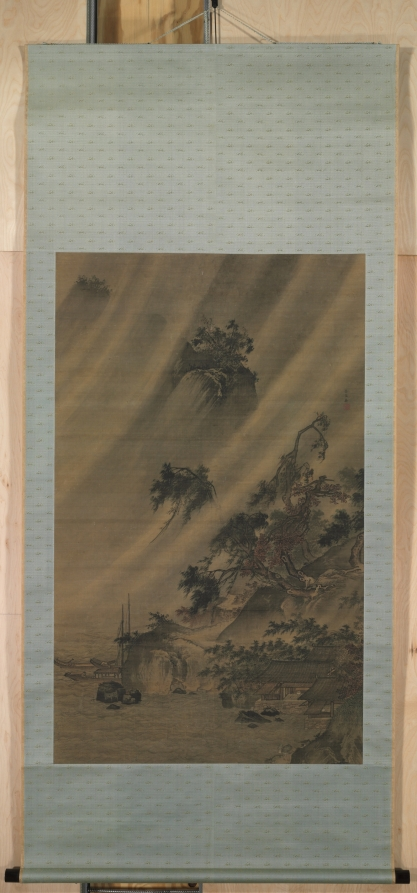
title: River Village in a Rainstorm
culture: China, Ming dynasty (1368–1644)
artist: Lu Wenying (Chinese)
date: c. 1480–1507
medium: Hanging scroll; ink and slight color on silk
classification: Painting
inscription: 呂文英 [印] 日近清光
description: In this scene, windswept rain pelting a village captures the power of nature in a masterful composition. Lü Wenying from Zhejiang served as a court painter during the Hongzhi era (1488–1505). Hardly known, with few remaining works, he is considered a Zhe school painter who followed the style of the Southern Song academy. Zhe school painters, named after the province of Zhejiang, transformed the poetic scenery of the Southern Song artists into dramatic, large-scale views. Active in the same region with frequent monsoon rains in the summer season, artists were familiar with outbreaks of rain and storms.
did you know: A young boy peeks out a window perhaps viewing the two people struggling through the rain.